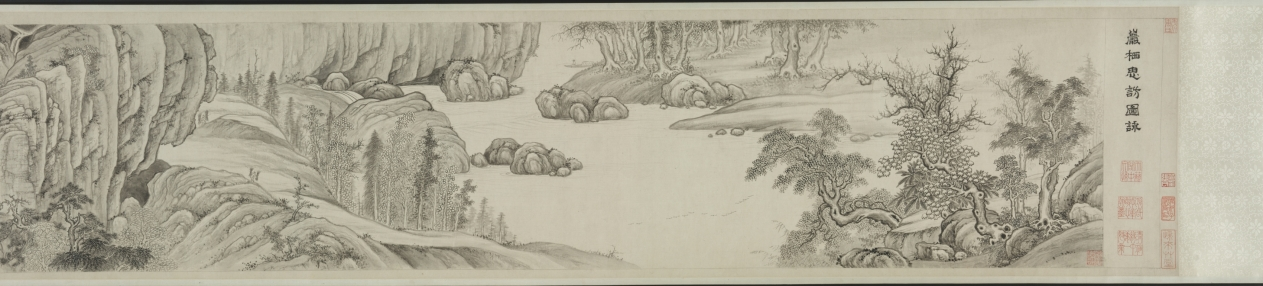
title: Meditative Visit to a Mountain Retreat: In Picture and in Words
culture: China, Ming dynasty (1368–1644)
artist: Xiang Shengmo (Chinese, 1597–1658)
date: 1648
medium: handscroll; ink on paper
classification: Painting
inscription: Artist's title and 3 seals (in front of painting): [title] Meditative Visit to a Mountain Retreat: In Picture and in Words 巖栖思訪圖詠 [3 seals] Tian lai ge zhong wen sun 天籟閣中文孫; Xiang shi kong zhang zui xin han mo 項氏孔彰醉心翰墨; Qing fu yuan zhong di yi miao ye 清福緣中第一妙業.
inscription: [印] 兔烏叟; 考古正今. 觀斯人兮何逍遙，非逍遙兮思其友。 思其友兮天一方，欲一訪之難回首。 松耶柏耶稱後凋，巖穴霏微何二酉。 山兮水兮人悠悠，遠莫致之神交否？ 河關一向望不及，言笑于今更非偶。 問游魚兮樂何深？問飛鳥兮歸何藪？ 問猿鶴兮何親疎？問鹿豕兮何夭壽？ 問白雲兮從何來？問流泉兮向何走？ 問漁樵兮何江山？問草木兮何畝畎？ 問春秋兮何炎涼？問世人兮何長久？ 問日月兮何晦明？曾見當時烏兔叟？ 戊子嘉平之初偶作此圖并題。 胥樵項聖謩識。 [印] 兔烏叟; 項氏孔彰; 未喪斯文.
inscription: 13 additional seals: 4 of Tang Zuomei 唐作梅 (late 18th–19th century); 3 of Zhang Baixi 張百熙 (1847–1907); 4 of Zhang Heng 張珩 (1915–1963); 2 unidentified.